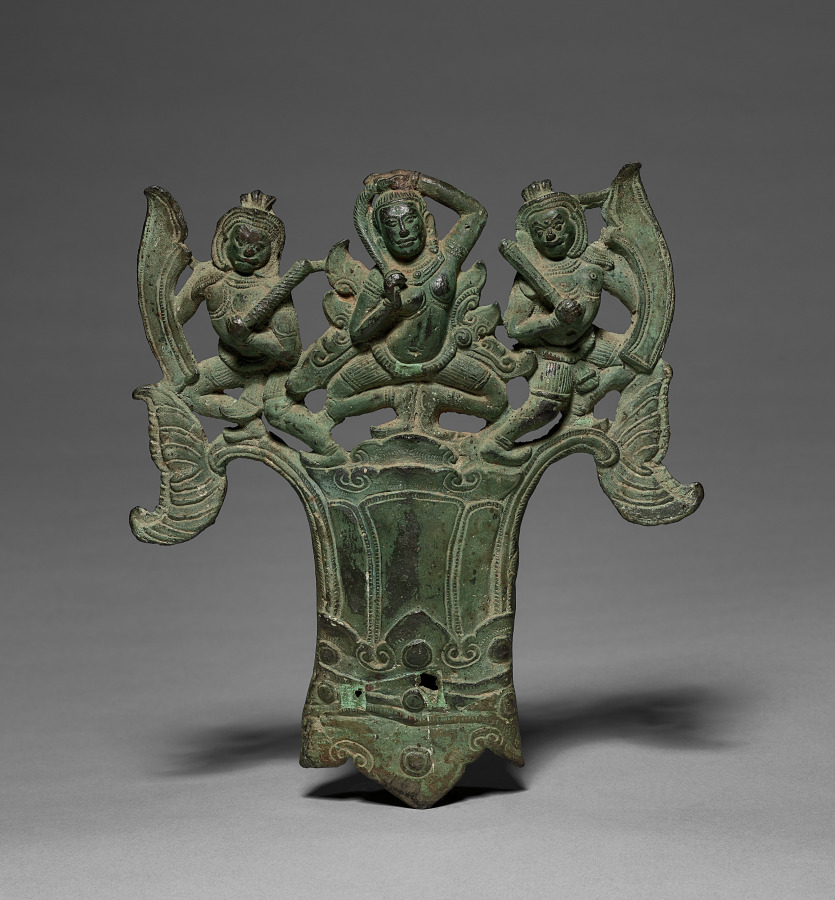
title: Finial with the temptation of Buddha by Mara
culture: Cambodia, reign of Jayavarman 7th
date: late 1100s–early 1200s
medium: bronze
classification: Sculpture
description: The Buddha sits surrounded by a circle of flaming jewels and full-blown lotus petals. Two rearing serpents emblematic of the glory of the Khmer Empire emerge from either side of his lotus pedestal. The Buddha’s right hand points down in the earth-touching gesture, and his left hand holds a round object, probably a special rice offering that indicates the Buddha’s power to ensure ongoing prosperity of the land. The branches of the pipal tree under which the Buddha reached enlightenment top the composition. Beneath his lotus pedestal, the earth goddess wrings the waters from her hair that wash away the army of Mara, the grimacing demons holding clubs and shields who flee to either side.